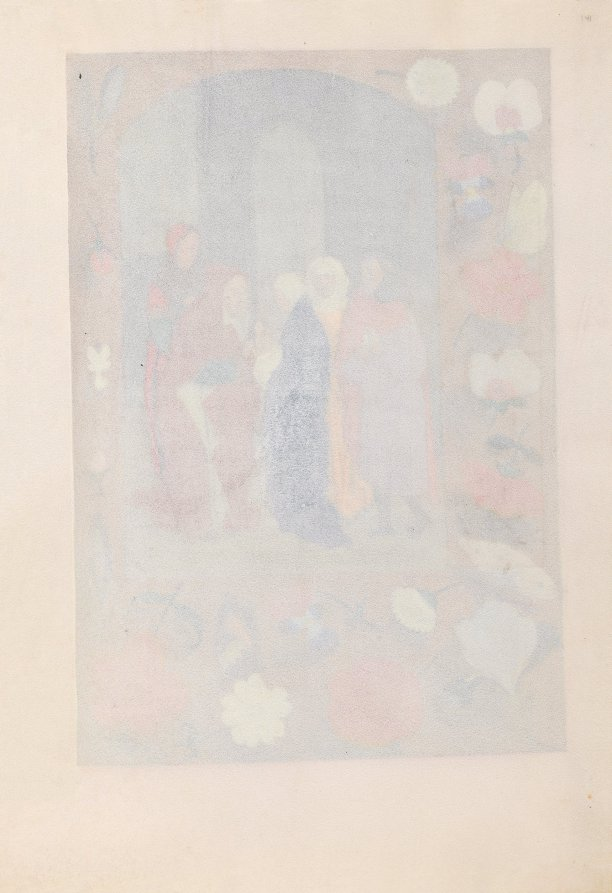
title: Hours of Queen Isabella the Catholic, Queen of Spain: Fol. 141r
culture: Flanders, Ghent and Bruges, late 15th century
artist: Master of the First Prayerbook of Maximillian (Flemish, c. 1444–1519)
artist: and Associates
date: c. 1500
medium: ink, tempera, and gold on vellum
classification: Bound Volume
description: This manuscript was illuminated by a circle of at least five highly organized manuscript painters active in the Flemish cities of Ghent and Bruges. The principal illuminator was Alexander Bening, who painted the majority of the book's miniatures. Manuscripts produced by this circle of artists are renowned for the decoration of their borders, which typically feature a rich variety of realistically-painted flowers, birds, and butterflies. This prayer book, called a book of hours, was intended not for a cleric, but for the private devotions of a lay person-in this case, Isabella the Catholic, Queen of Spain (1451-1504). Isabella's coat of arms embellishes the book's frontispiece. It is unlikely that the book was commissioned by the Queen herself; rather, she probably received it as a diplomatic gift from someone courting her patronage, perhaps Cardinal Francisco Jimenez de Cisneros. A Franciscan friar, Jimenez was dependent upon Isabella for his advancement, first to the post of Queen's confessor in 1492, and then to Archbishop of Toledo in 1495.